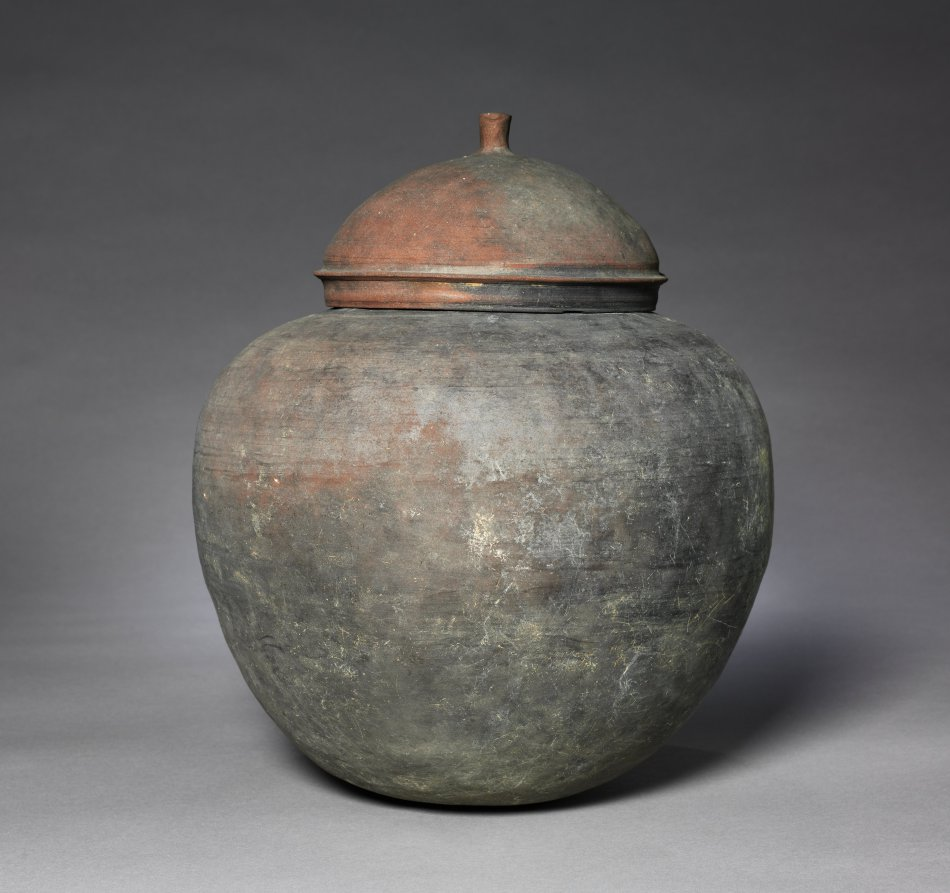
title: Vessel with Knobbed Lid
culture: Korea, Unified Silla period (676-935)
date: 676–935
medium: stoneware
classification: Ceramic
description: This storage vessel is distinguished by its robust, subtly proportioned form and its body color. The purplish-brown surface "skin" is enlivened by a series of smoky black swirling marks that occurred during the firing in the wood kiln. This shape began as a series of clay coils that were pinched and then paddled; however, it spent more time on a potter's wheel to thin and finish its outer surface. The lid received similar, understated attention to detailing and finish.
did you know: This type of lidded vessel served to contain cremated remains, indicating the popularity of Buddhist mortuary practice in Korea during the Three Kingdoms period.